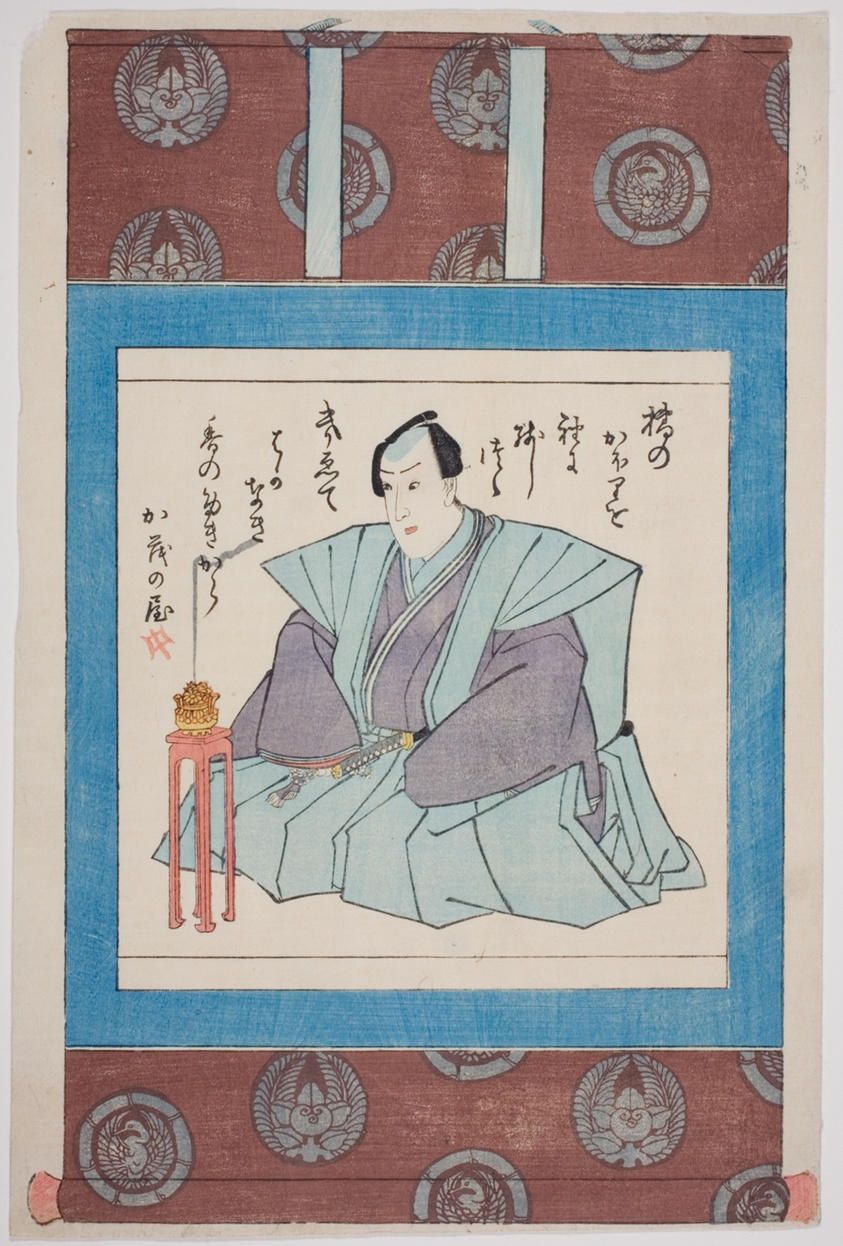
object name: Print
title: Memorial Portrait of the Actor Ichimura Takenojo V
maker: Utagawa School (Japanese, 19th century)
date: 1851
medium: Color woodblock print; oban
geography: Japan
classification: print; asian art